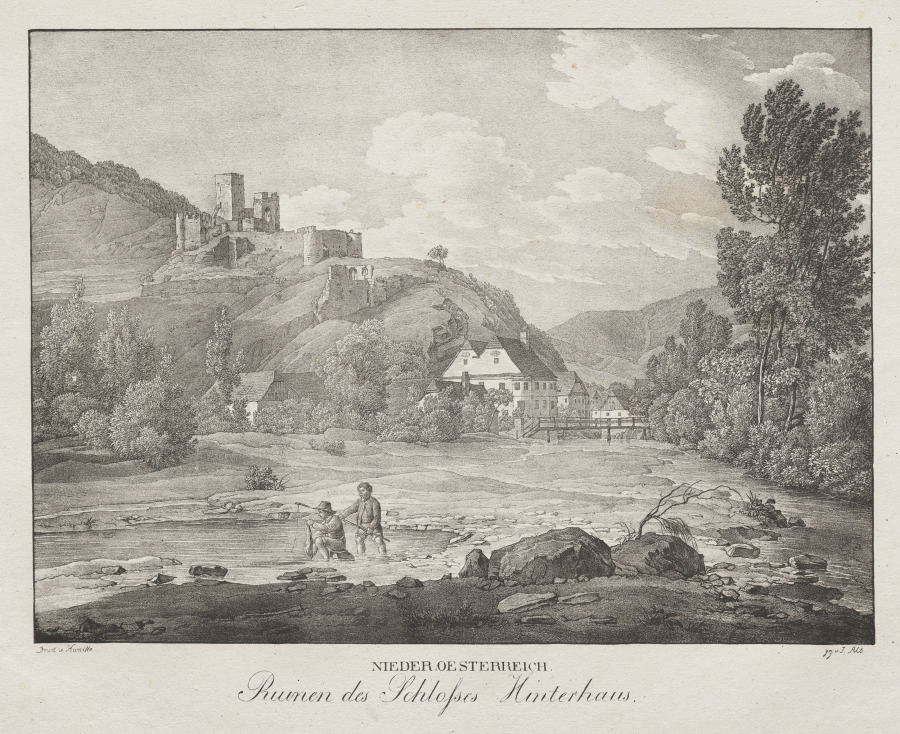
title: Nieder-oesterreich, Ruinen des Schlosses Hinterhaus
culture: Austria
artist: Jakob Alt (Austrian, 1789–1872)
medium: lithograph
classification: Print